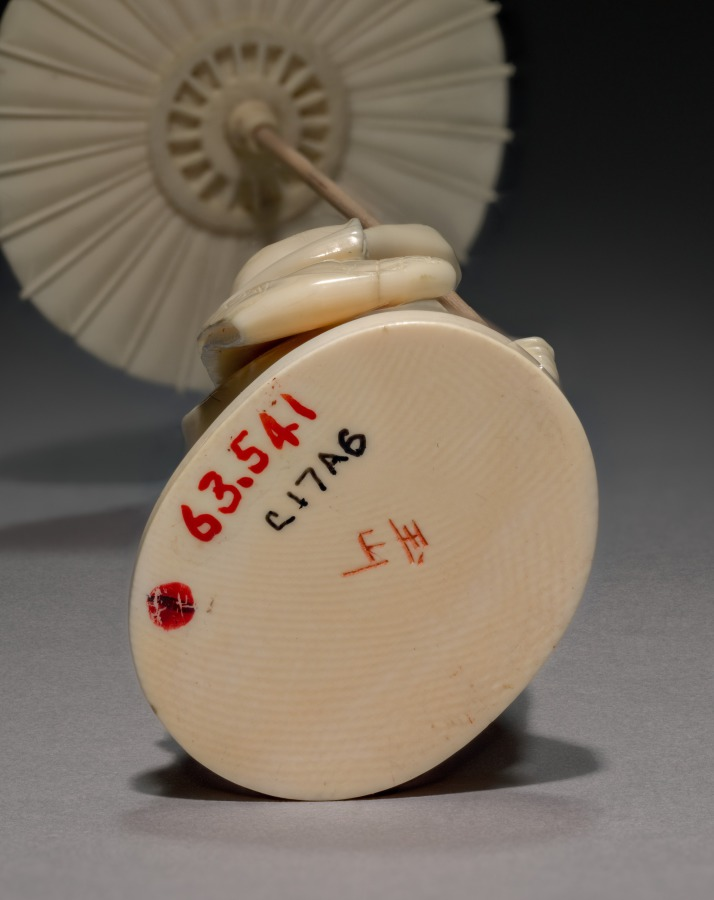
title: Woman Carrying a Parasol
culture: Japan, Meiji period (1868–1912)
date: Late 1800s- Early 1900s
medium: ivory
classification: Ivory